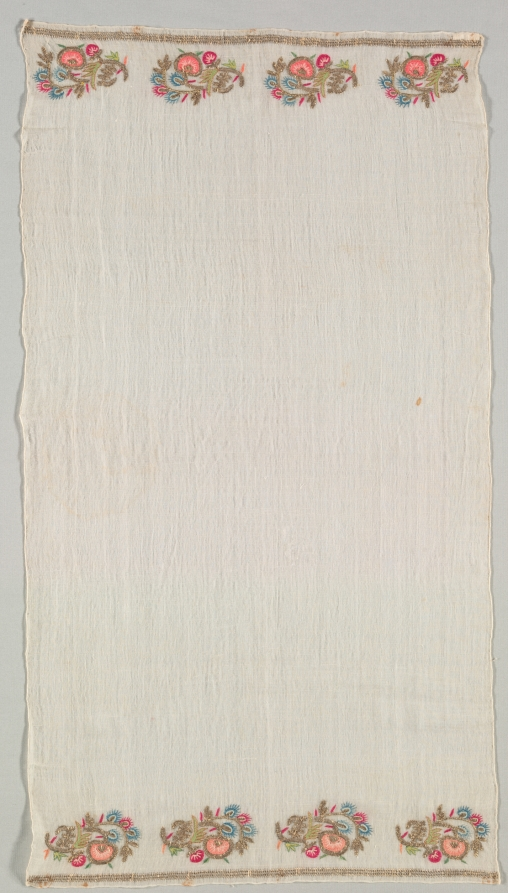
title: Embroidered Towel (Peshkir)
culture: Turkey, 19th century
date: 19th century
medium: embroidery; silk and gold filé on cotton tabby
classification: Embroidery